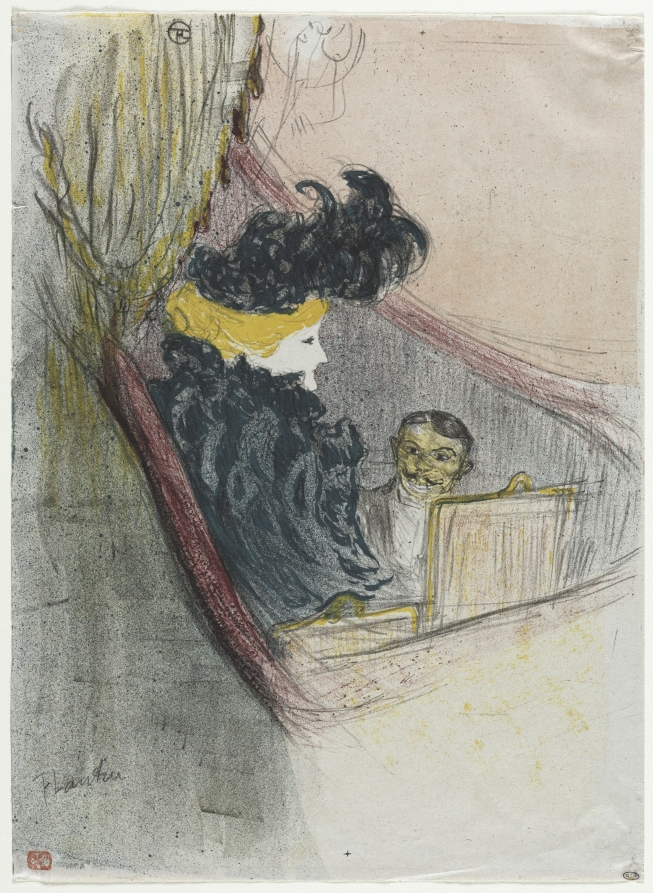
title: A Princely Idyl, Clara Ward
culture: France, 19th century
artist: Henri de Toulouse-Lautrec (French, 1864–1901)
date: 1897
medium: color lithograph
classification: Print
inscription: On stone, upper left, in monogram: H.T.L.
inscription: In graphite, lower left: "H. T-Lautrec (signed) No. 6"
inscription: in graphite, lower left corner: "No.6, red stamp"